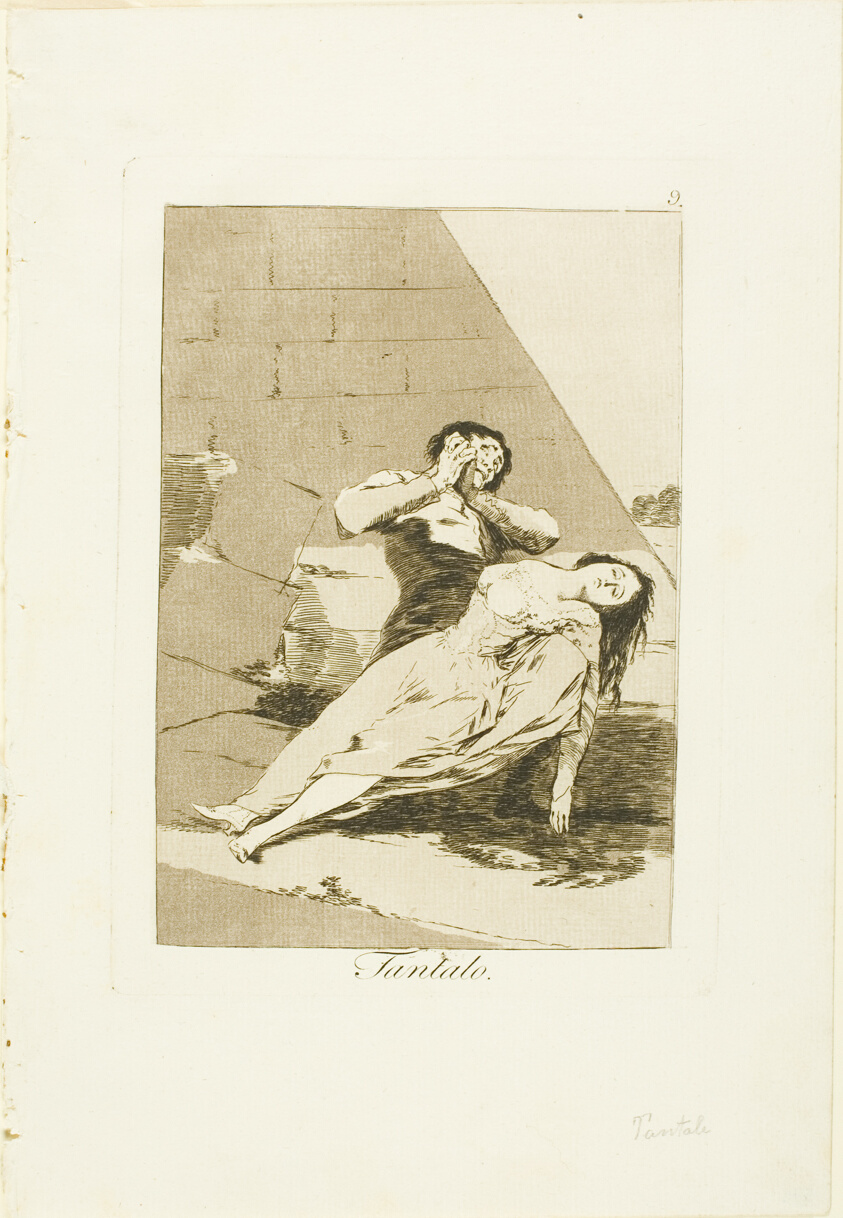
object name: Print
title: Tantalus, plate 9 from Los Caprichos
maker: Francisco José de Goya y Lucientes (Spanish, 1746-1828)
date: 1797/99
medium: Etching and aquatint on ivory laid paper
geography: Spain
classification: etching; print; prints and drawing